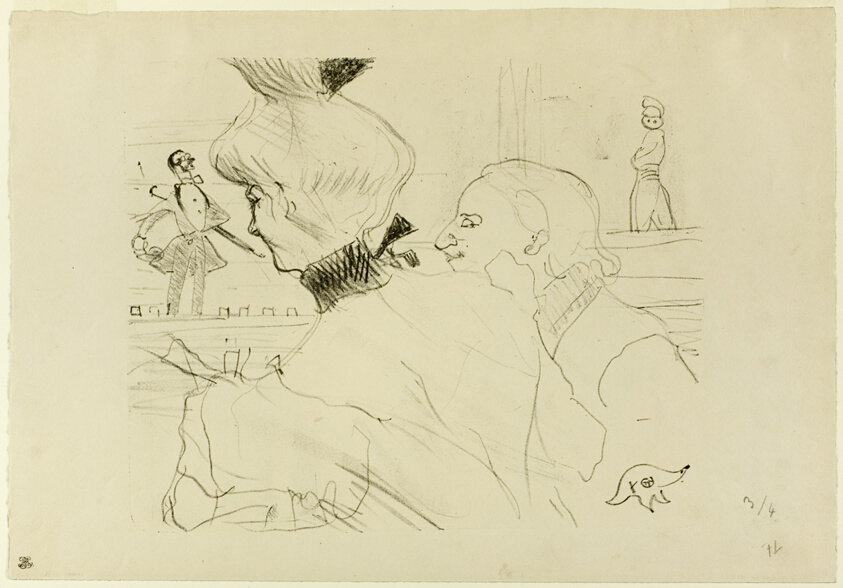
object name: Print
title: Couple at a Café-Concert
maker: Henri de Toulouse-Lautrec (French, 1864-1901)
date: 1899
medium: Lithograph on cream wove paper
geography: France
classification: lithograph; print; prints and drawing